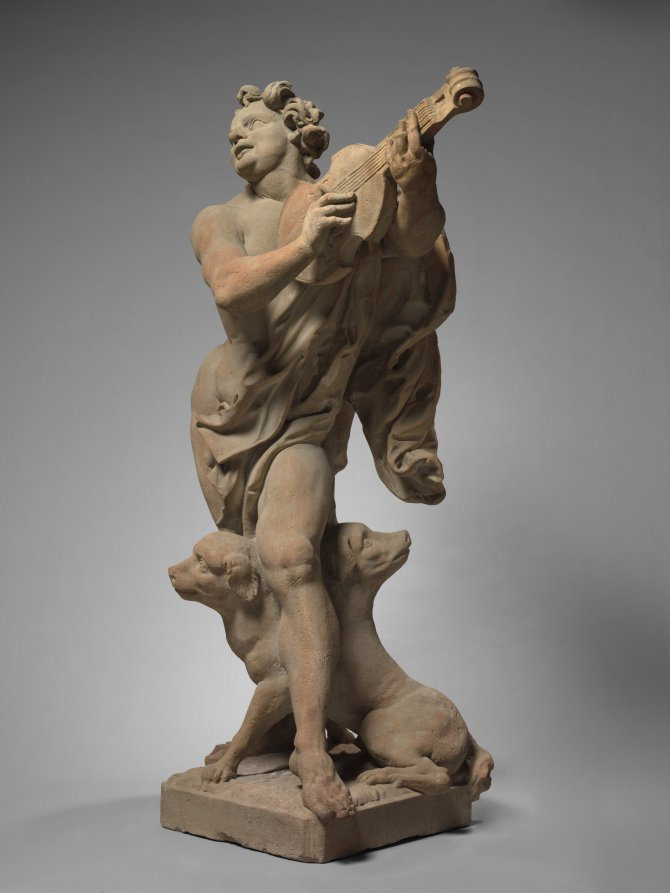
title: Orpheus and Cerberus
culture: Germany, near Bamberg, 18th century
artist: Ferdinand Tietz (Austrian, 1708–1777)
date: c. 1765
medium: sandstone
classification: Sculpture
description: This work was one of numerous sculptures Tietz created for the gardens of Schloss Seehof, near Bamberg in Bavaria (Germany), the summer residence of the Prince Bishops of Bamberg. The exaggerated forms of Orpheus's face and musculature caricature the idealized proportions of classical sculpture. A further parody exists with his companion: the usually terrifying hound Cerberus is here nothing more than a docile puppy, sitting calmly at Orpheus's feet. Meant to be viewed outdoors, on a high pedestal and from a distance, this work is less finely detailed than sculptures Tietz made for indoor settings at Seehof.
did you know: Taught to play the lyre by the Greek god Apollo, Orpheus's legendary musical abilities had the power to charm animals.